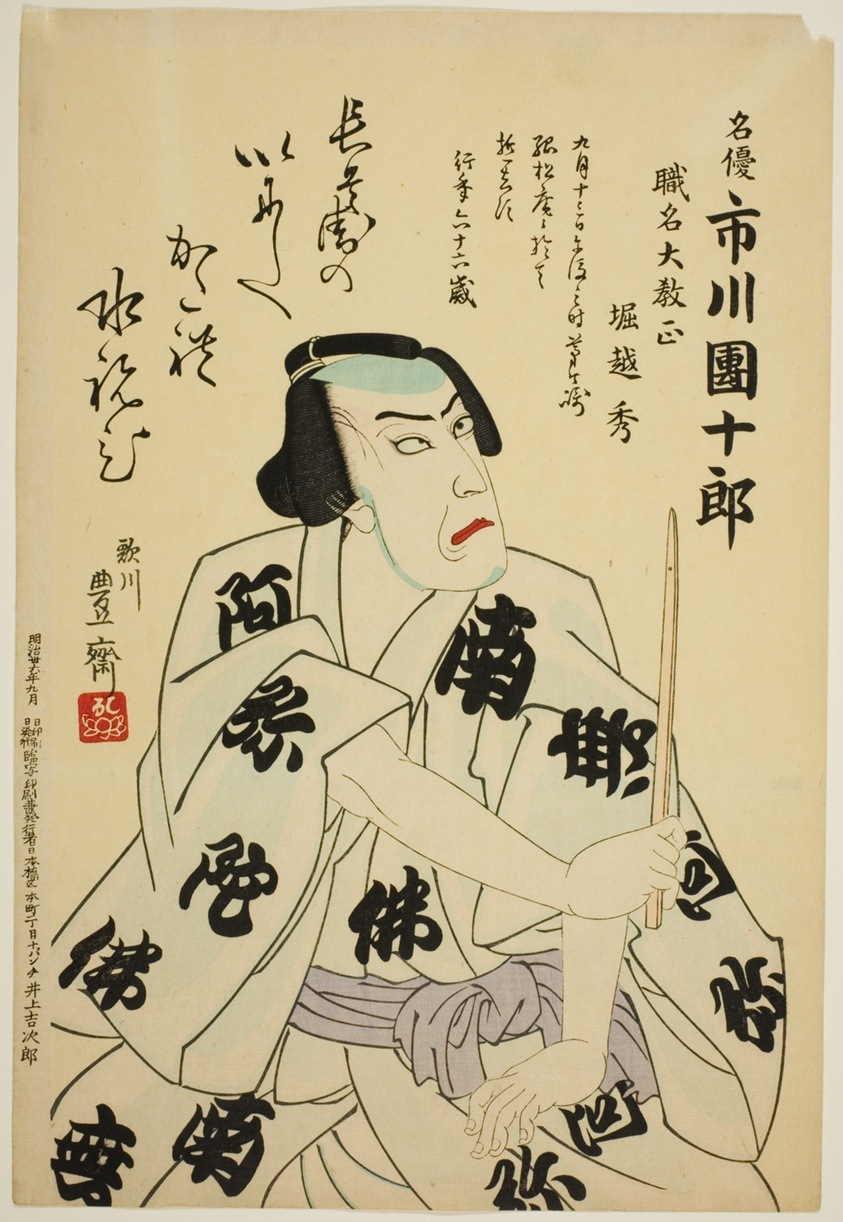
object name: Print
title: Memorial Portrait of the Actor Ichikawa Danjuro IX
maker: Utagawa Kunisada III (Kunimasa IV, Toyokuni V) (Japanese, 1848–1920)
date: 1903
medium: Color woodblock print; oban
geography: Japan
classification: print; asian art